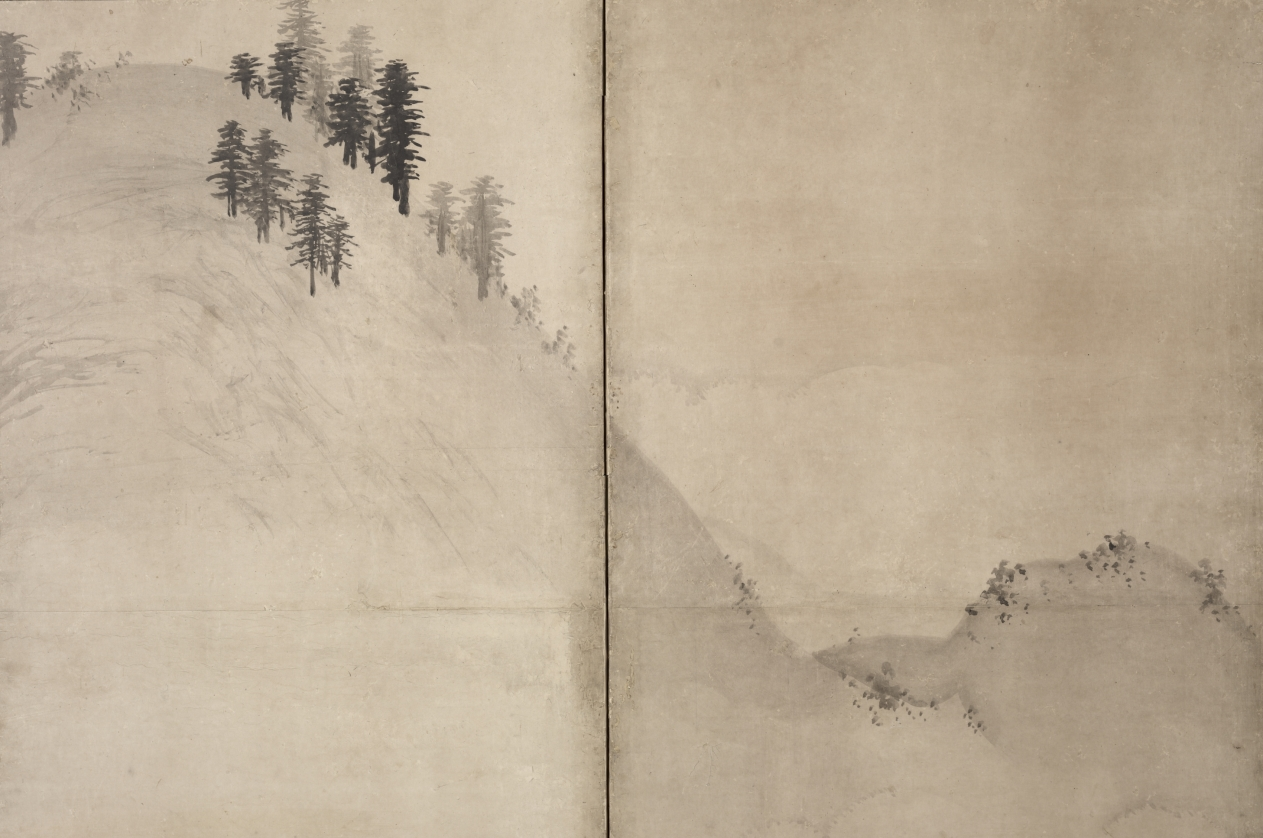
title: Pan Lang (Han Rō)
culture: Japan, Momoyama period (1573–1615)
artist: Unkoku Tōgan (Japanese, 1547–1618)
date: early 1600s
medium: one of a pair of six-panel folding screens; ink, light color, and gold on paper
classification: Painting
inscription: Each screen in the pair is impressed with two seals arranged vertically, a round "Unkoku" seal above and square "Togan" seal below.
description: This is one of the pair of screens depicts episodes from the stories of famed Song-dynasty poets Su Shi of the 1000s and Zhou-dynasty official Pan Lang of the 900s. Both men were banished by their rulers for their perceived missteps. Su Shi’s comments on a series of economic reforms were seen as criticism of the emperor. Pan Lang composed an ill-advised verse about one of the king’s horses. In this screen Pan rides backward on his donkey as he returns from exile so that he may have a last look at his now beloved Mount Hua. Su Shi, on the other screen, is shown embarking on his journey into exile. The artist of these screens, Unkoku Tōgan, was the founder of the Unkoku school of painting, which emulated the style of renowned ink painter Sesshū Tōyō (1420–1506). Tōgan was the official painter of the Mori family of what is now Yamaguchi prefecture in the south of Japan.